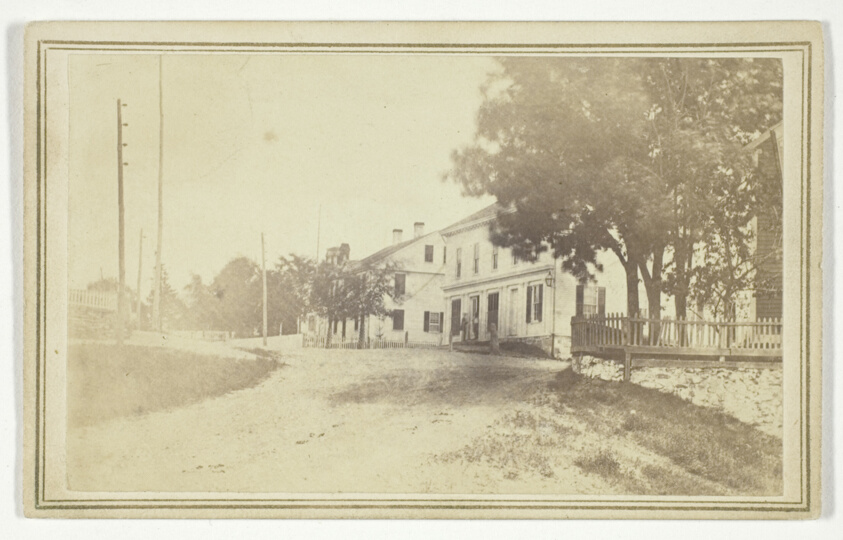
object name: Photograph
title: Untitled (view of road with white clapboard houses)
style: 19th century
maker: T. Holmes (American, 19th century)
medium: Albumen print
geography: United States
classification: photographic process; photography; card photographs; photograph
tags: Collected by Hugh Edwards